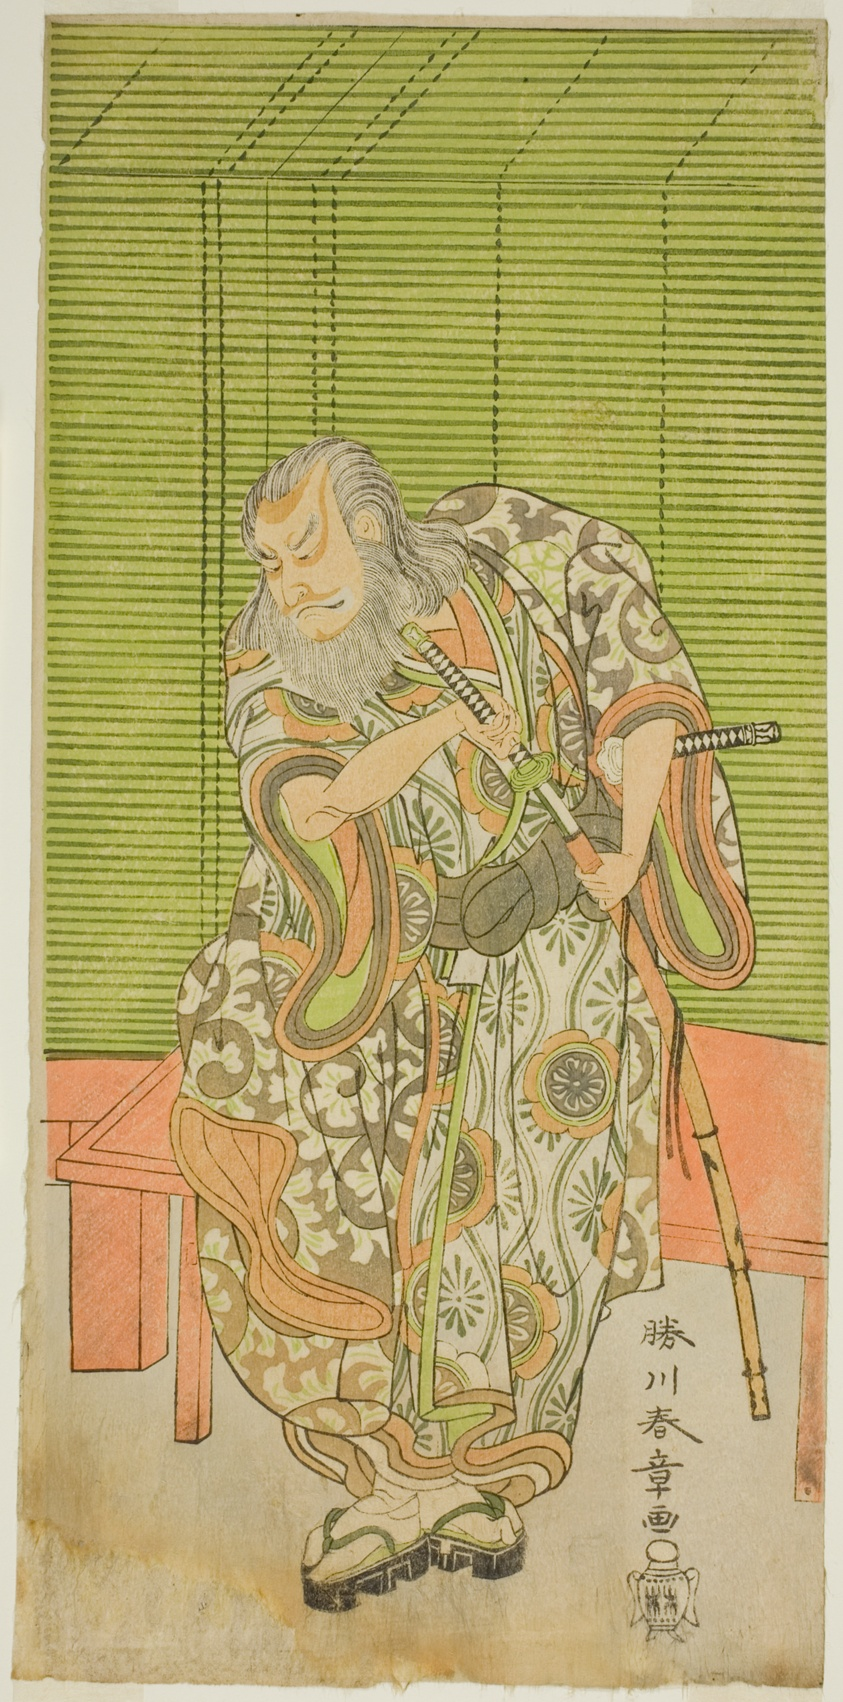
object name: Print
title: The Actor Nakamura Nakazo I as Hige no Ikyu in the Play Sakai-cho Soga Nendaiki, Performed at the Nakamura Theater in the Third Month, 1771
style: Japanese (culture or style)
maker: Katsukawa Shunsho 勝川 春章; Japanese, 1726-1792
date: c. 1771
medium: Color woodblock print; hosoban; from a multisheet composition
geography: Japan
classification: woodblock print; print; asian art